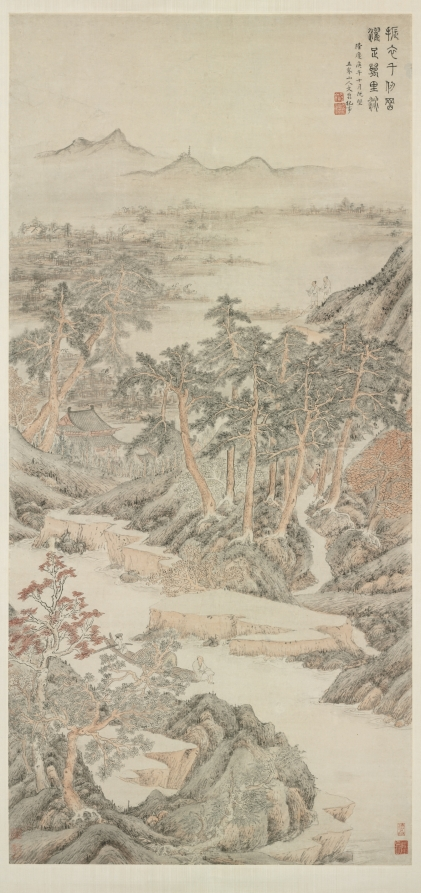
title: Washing the Feet (from the Dusty World)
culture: China, Ming dynasty (1368–1644)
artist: Wen Boren (Chinese, 1502–1575)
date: 1570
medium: Hanging scroll mounted on a panel; ink and color on paper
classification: Painting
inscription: Artist's inscription, signature, and 4 seals: Shaking one's clothes on a thousand-jen peak,/ Washing one's feet in a ten-thousand-li stream. In the gengwu year of the Longqing era [1570], fifteenth day of the tenth month, Wufeng shanren, Wen Boren recorded a special occasion. [2 seals] Wufeng shanren; Wen Boren Te-ch'eng chang. [2 seals, lower right corner] Te-ch'eng; She-shan chang. trans. HR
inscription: 2 additional seals of Zhang Heng 張珩 (1915-1963)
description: A scholar on a boat in the middle ground bathes his feet in the cooling stream. The vast river scene is depicted from a high viewing point. The motif of a scholar washing his feet illustrates the phrase, “When the waters of the Canglang are clear, I wash my capstrings. When the waters of the Canglang are muddy, I wash my feet [only]” (from Songs of Chu, written before 256 BC). The passage evokes the image of the virtuous scholar-official who avoids government service when the ruler is corrupt (the rivers are muddy) and resumes service (washing my capstrings) when the waters are clear. Whether the artist here alludes to unfavorable times of government is not clear.